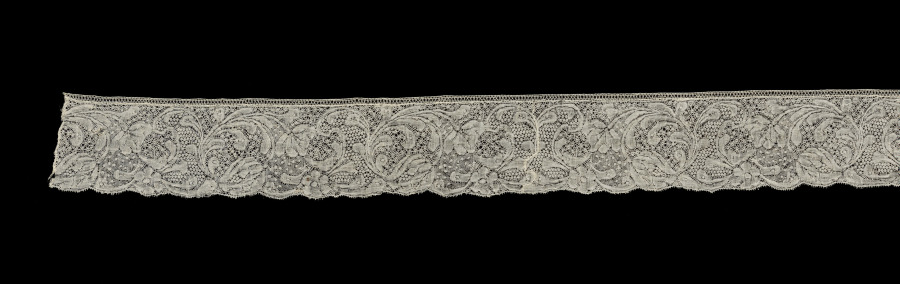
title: Lace Edging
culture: Belgium, Binche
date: 1700s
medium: Linen: bobbin lace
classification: Lace